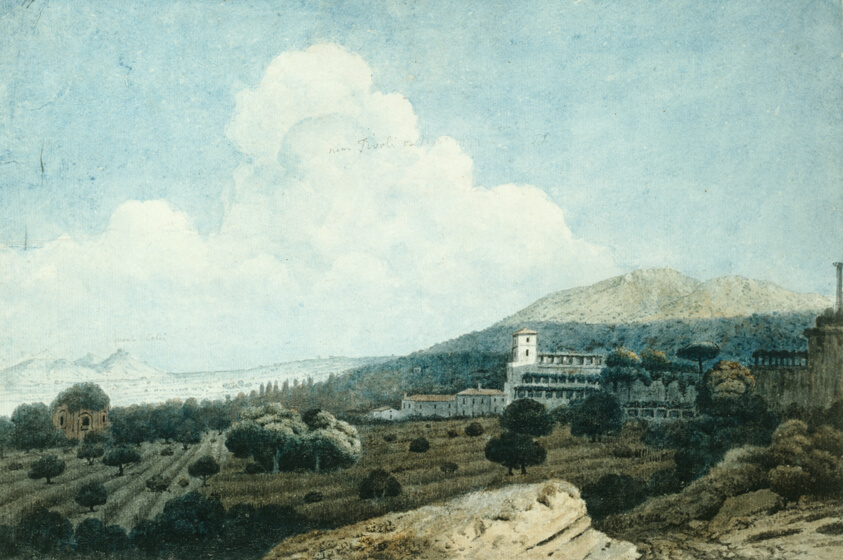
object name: Drawing and Watercolor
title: Near Tivoli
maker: Thomas Jones (Welsh, 1742-1803)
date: 1777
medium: Watercolor over graphite with gum arabic on cream laid paper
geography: Wales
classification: watercolor; drawings (visual works); prints and drawing